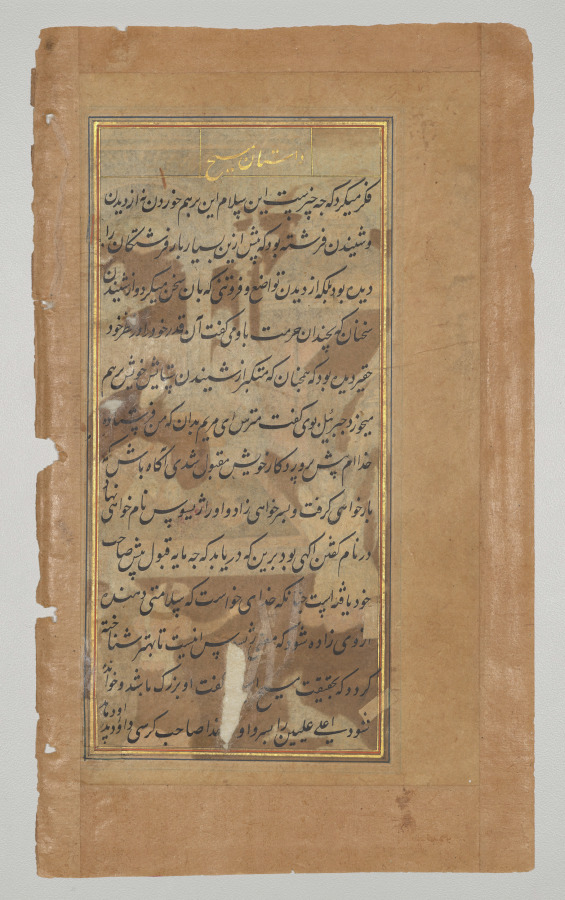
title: The Annunciation (folio 15 recto), from a Mirror of Holiness (Mir’at al-quds) of Father Jerome Xavier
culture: Mughal India, Allahabad, made for Prince Salim (1569–1627)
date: 1602–4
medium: Gum tempera, ink, and gold on paper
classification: Manuscript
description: Mary gazes down at the angel Gabriel as he kneels reverently, like a humble messenger, delivering the news that Mary will give birth to the son of God. His multicolored wings are forced within the boundary line of the painting field, visually implying a sense of subordination. Unlike many of the paintings in the Mirror of Holiness, the Annunciation is a familiar subject in European art, but the emphases vary. The Indian version depicts her as a queen, with a crown held above her head and attendants standing by.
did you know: The text states that Mary was only age 13 1/2 when the angel Gabriel came to her.